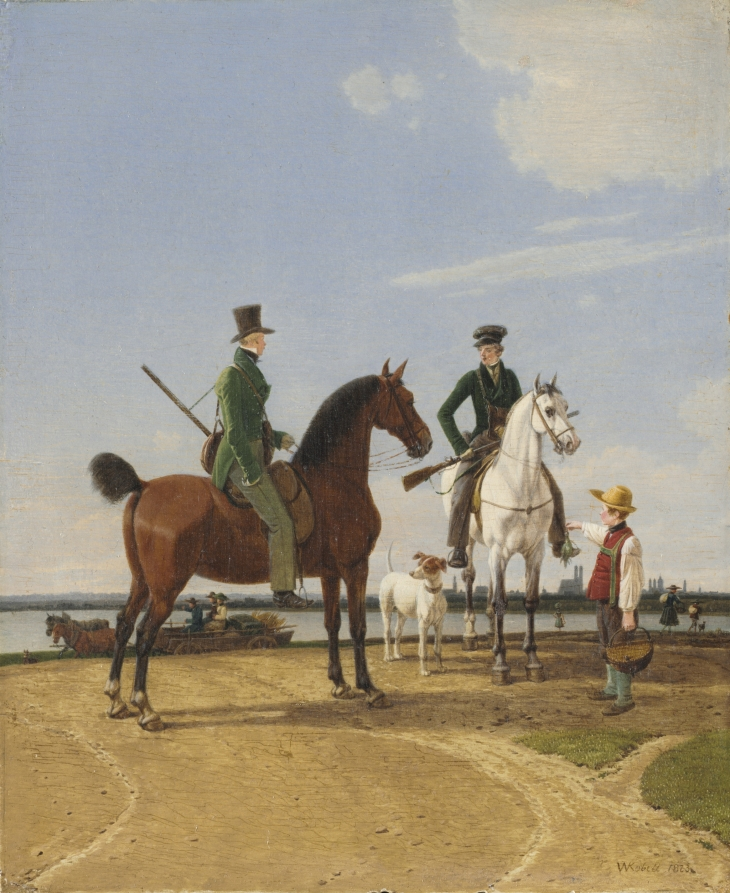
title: Hunter and Lord at the River Isar with View of Munich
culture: Germany, 19th century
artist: Wilhelm von Kobell (German, 1766–1853)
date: 1823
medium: oil on wood panel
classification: Painting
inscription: Signed lower right corner: WKobell 1823 [WK in monogram]